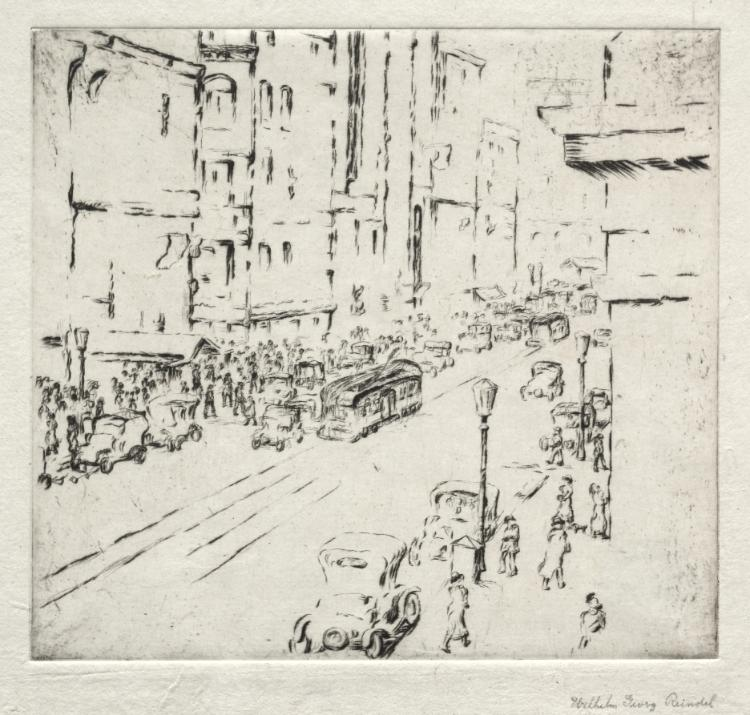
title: The Avenue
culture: America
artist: William George Reindel (American, 1871–1948)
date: c. 1918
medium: drypoint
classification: Print